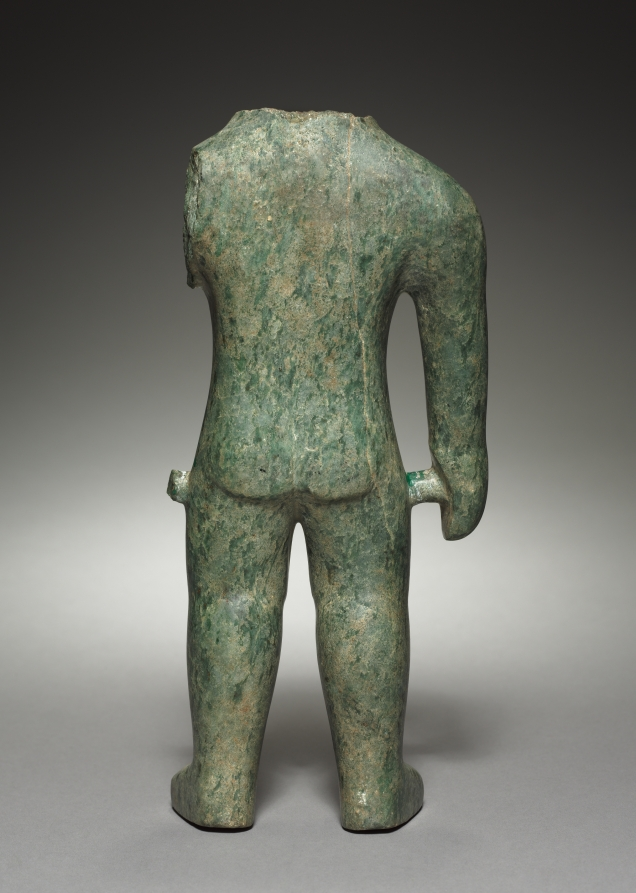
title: Figure Fragment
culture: Mesoamerica, Mexico, Olmec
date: c. 900–400 BCE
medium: greenstone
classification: Jade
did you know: In ancient Mesoamerica, greenstone was more valuable than gold.